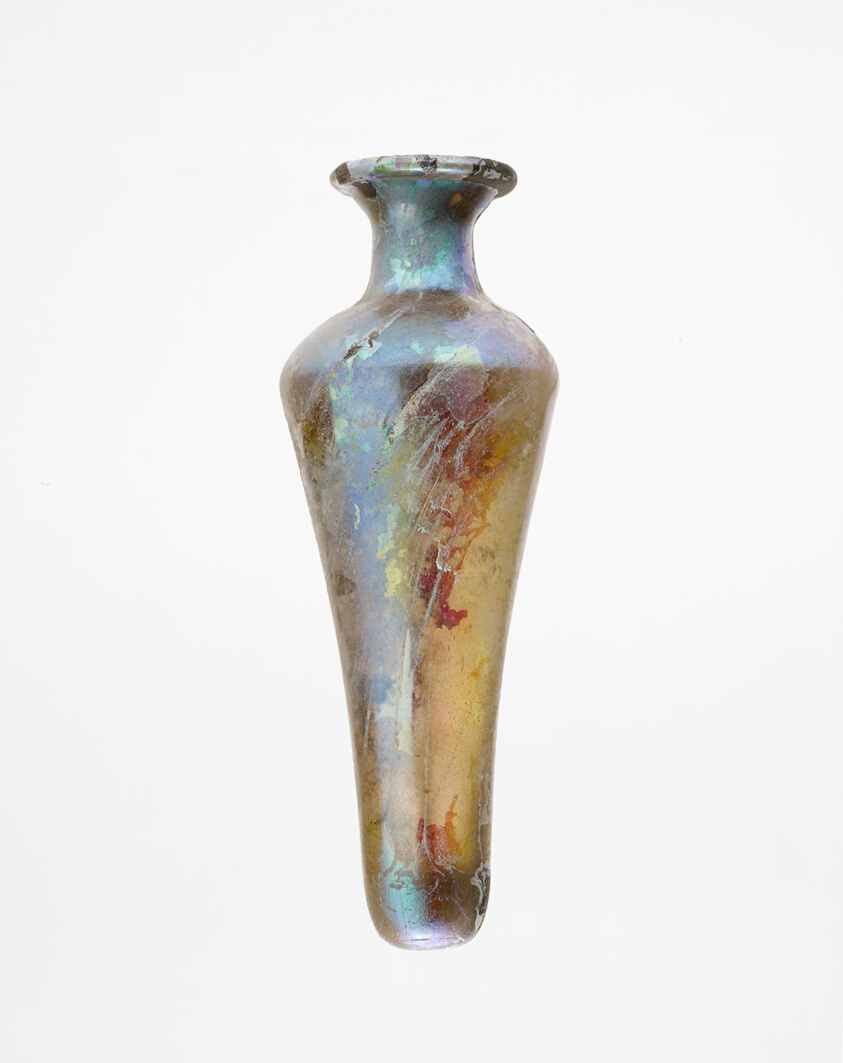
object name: Vessel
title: Flask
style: syrian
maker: Roman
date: 3rd-4th century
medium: Glass, blown technique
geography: Syria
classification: vessel; glass; ancient art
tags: bottles